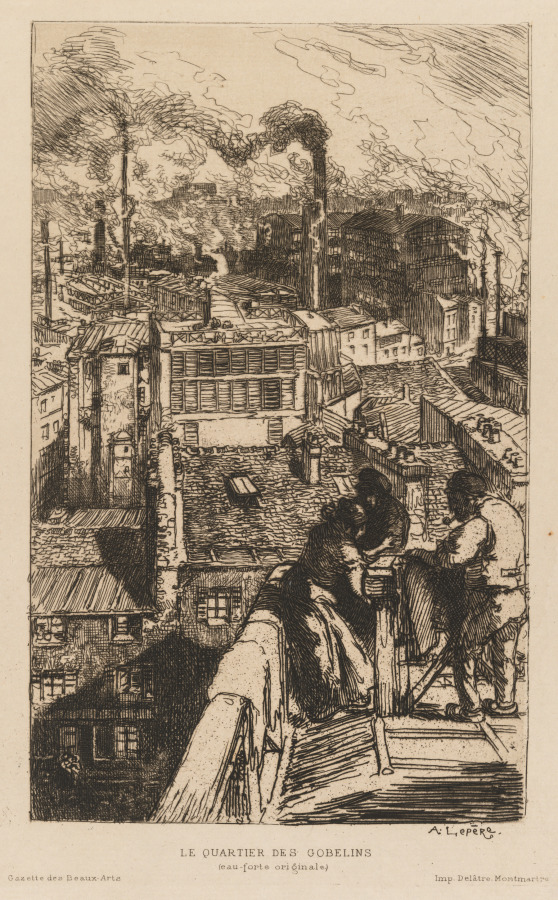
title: Gazette des Beaux-Arts: Le Quartier des Gobelins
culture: France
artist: Auguste Louis Lepère (French, 1849–1918)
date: 1889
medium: etching on laid paper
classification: Print